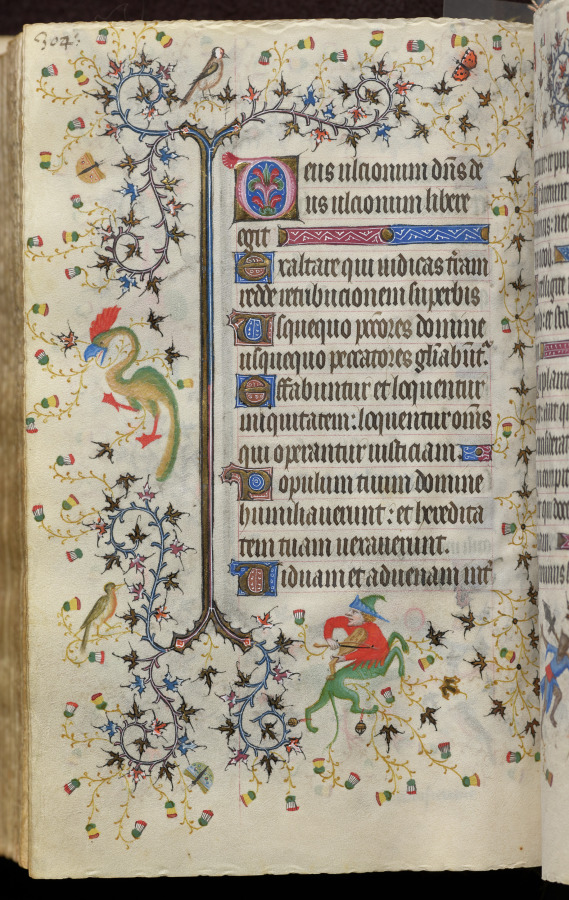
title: Hours of Charles the Noble, King of Navarre (1361-1425): fol. 152v, Text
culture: France, Paris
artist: Master of the Brussels Initials and Associates (French)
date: c. 1405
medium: ink, tempera, and gold on vellum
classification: Bound Volume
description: This precious volume was obviously highly prized by its owner, the French-born King of Navarre, who had his coat of arms painted on no less than twenty folios. Rather than directly commissioning this manuscript from a specific workshop, it seems that Charles the Noble acquired his book of hours -- perhaps ready-made for the luxury market -- while on a trip to Paris in 1404-05. A collaborative effort, six painting styles are evidenced within the pages of this codex, those of two Italians, two Frenchmen, and two Netherlanders. The painter who was responsible for the planning and decoration of the book, and who produced seventeen of the large miniatures, was a Bolognese artist known as the Master of the Brussels Initials. His principal assistant, responsible for most of the borders, was a Florentine who signed his name "Zecho" da Firenze on folio 208 verso.